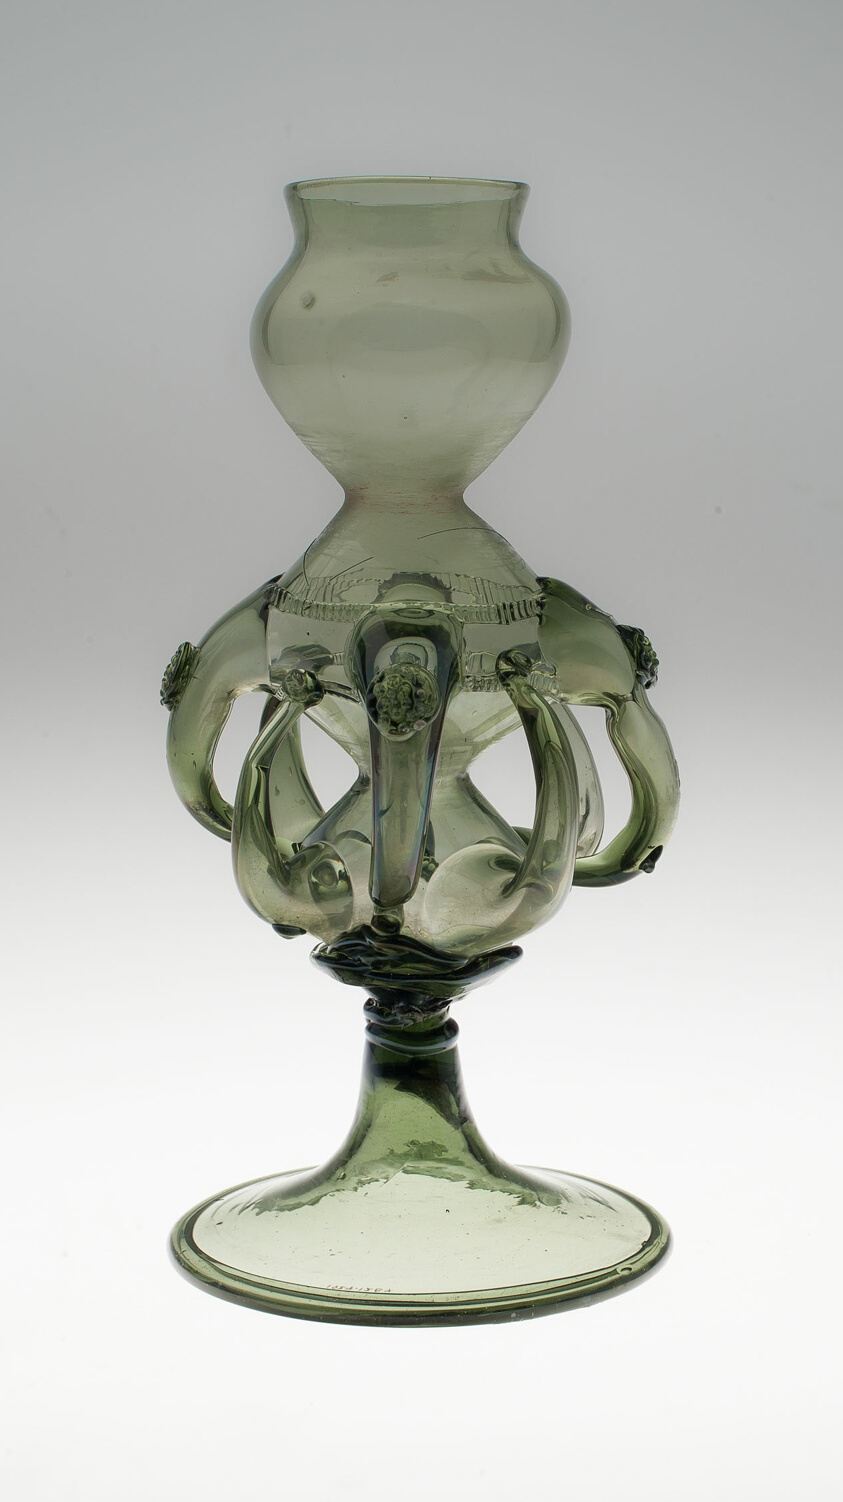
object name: Glass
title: Puzzle Mug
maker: Germany, possibly Rheinland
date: 16th century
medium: Glass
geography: Germany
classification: glass; european decorative arts